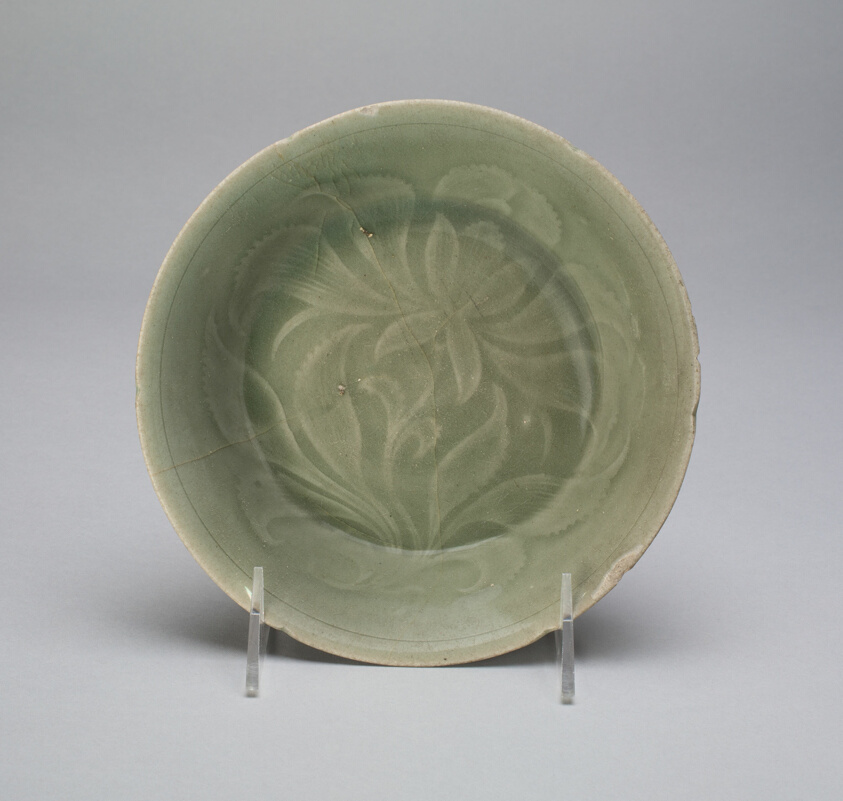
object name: Vessel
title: Bowl with Stylized Flowers and Leaves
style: Korean (culture or style)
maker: Korea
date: Goryeo dynasty (918–1392), mid/late 12th century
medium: Celadon-glazed stoneware with underglaze mold-impressed deocration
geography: Korea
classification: bowl; stoneware; dish (vessel); asian art; ceramics; vessel